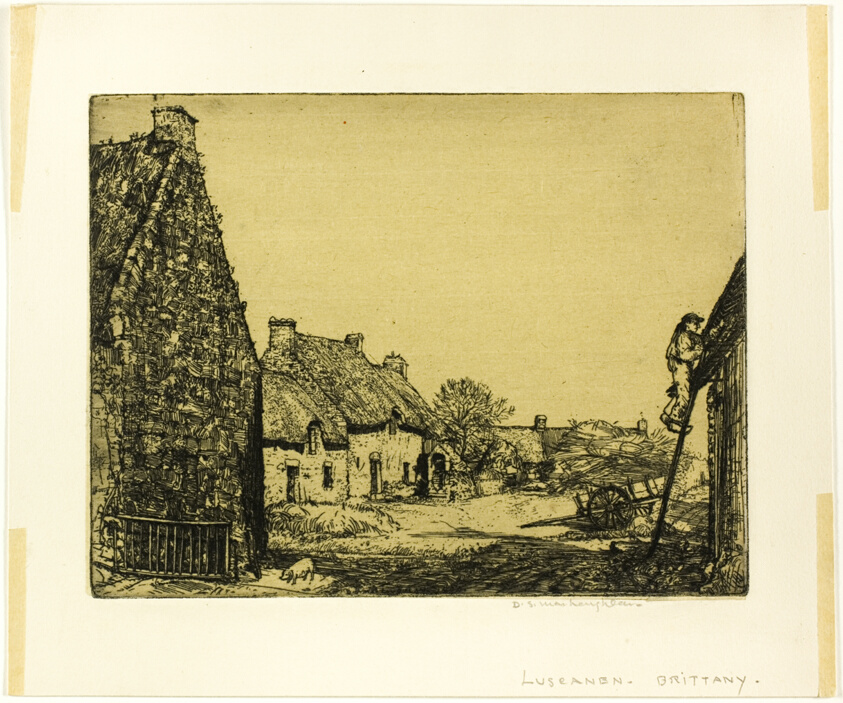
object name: Print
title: Luscanen, Brittany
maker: Donald Shaw MacLaughlan (American, born Canada, 1876-1938)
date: 1906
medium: Etching in black on buff wove paper, laid down on cream wove paper (chine collé)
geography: United States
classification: etching; print; prints and drawing